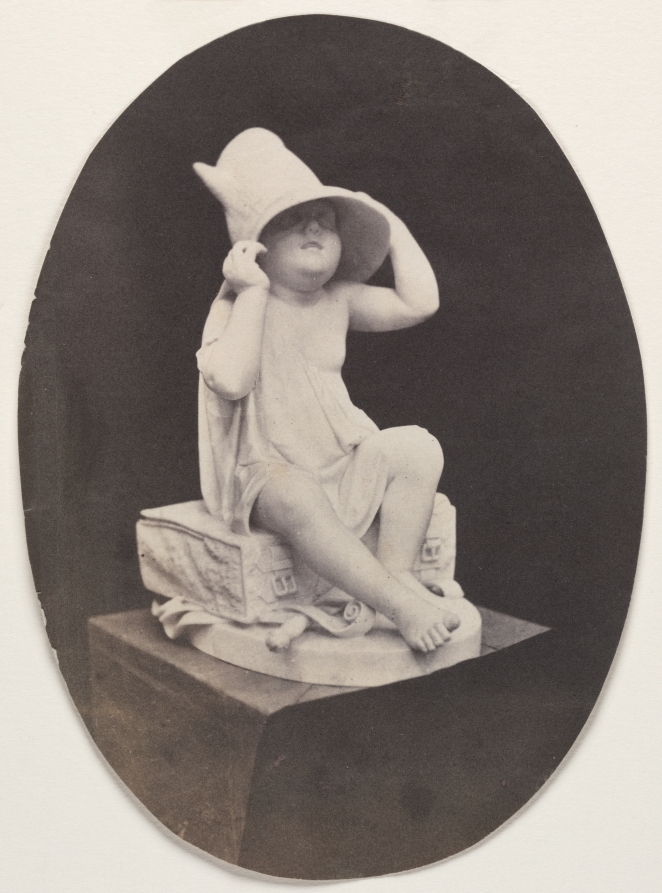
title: Statue of a Youth in Large Hat (from a John R. Johnston album)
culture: America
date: before 1857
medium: salted paper print from wet collodion negative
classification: Photograph